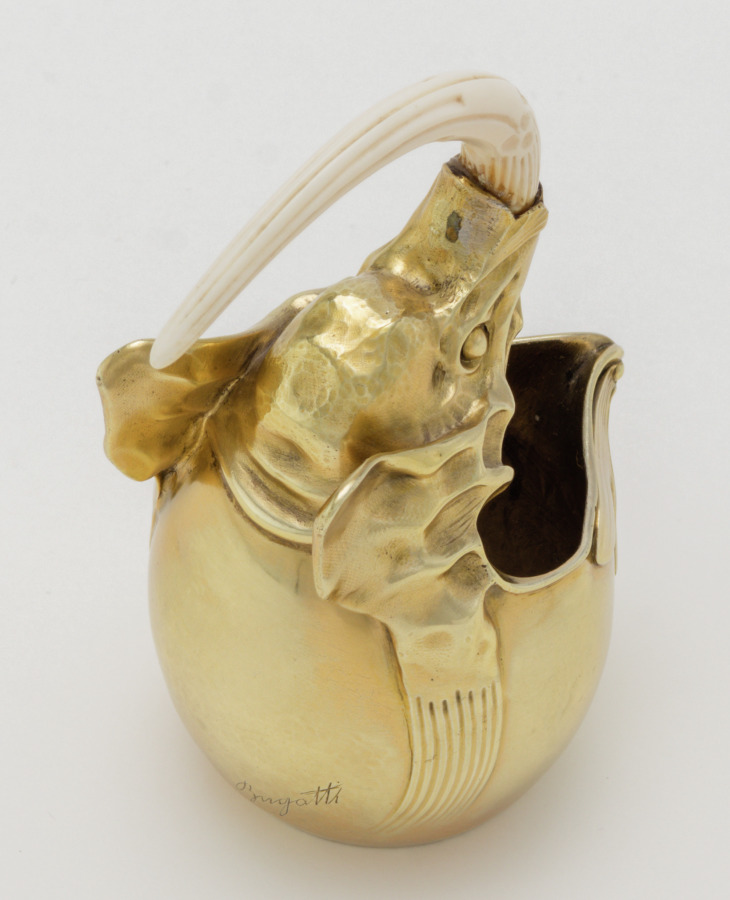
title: Creamer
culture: France, Paris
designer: Carlo Bugatti (Italian, 1856–1940)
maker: Adrien-Aurélien Hebrard (French, 1866–1937)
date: c. 1907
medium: Gilt silver and ivory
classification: Silver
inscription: Made by A. A. Hebrard Firm, Paris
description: This tea and coffee service, salver, and table, together with some now missing cups, were all designed by Carlo Bugatti as an ensemble and presented at the 1902 exposition devoted to decorative arts in Turin, Italy. The set was probably acquired from Bugatti's 1907 exhibition at the Galerie Hébrard in Paris by a wealthy South African widow, Anna Blake, who was living there at the time. Some of the animal and insect motifs suggest mythical beasts or the fossils of prehistoric animals. When Mrs. Blake returned to Cape Town, she took these and other pieces designed by Bugatti with her, and they remained in South Africa throughout her lifetime.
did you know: This creamer is part of a tea and coffee service designed by Carlo Bugatti.